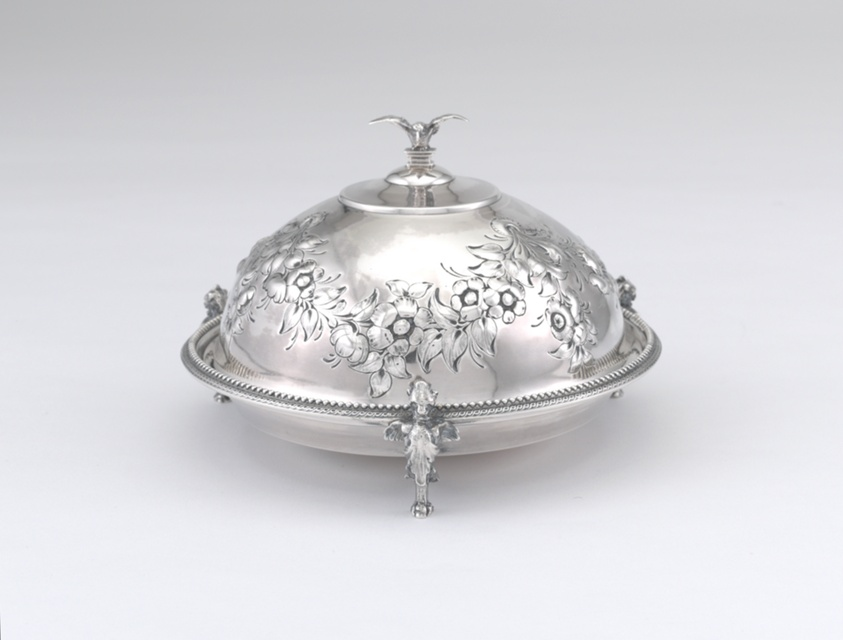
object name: Metalwork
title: Butter Dish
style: 19th century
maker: Gorham Manufacturing Company (American, founded 1831); Providence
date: 1853–65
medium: Silver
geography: Providence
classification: vessel for serving food; dish (vessel); silver; american decorative arts; american arts; decorative arts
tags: butter dish, birds, flowers, eagles, dining, eating